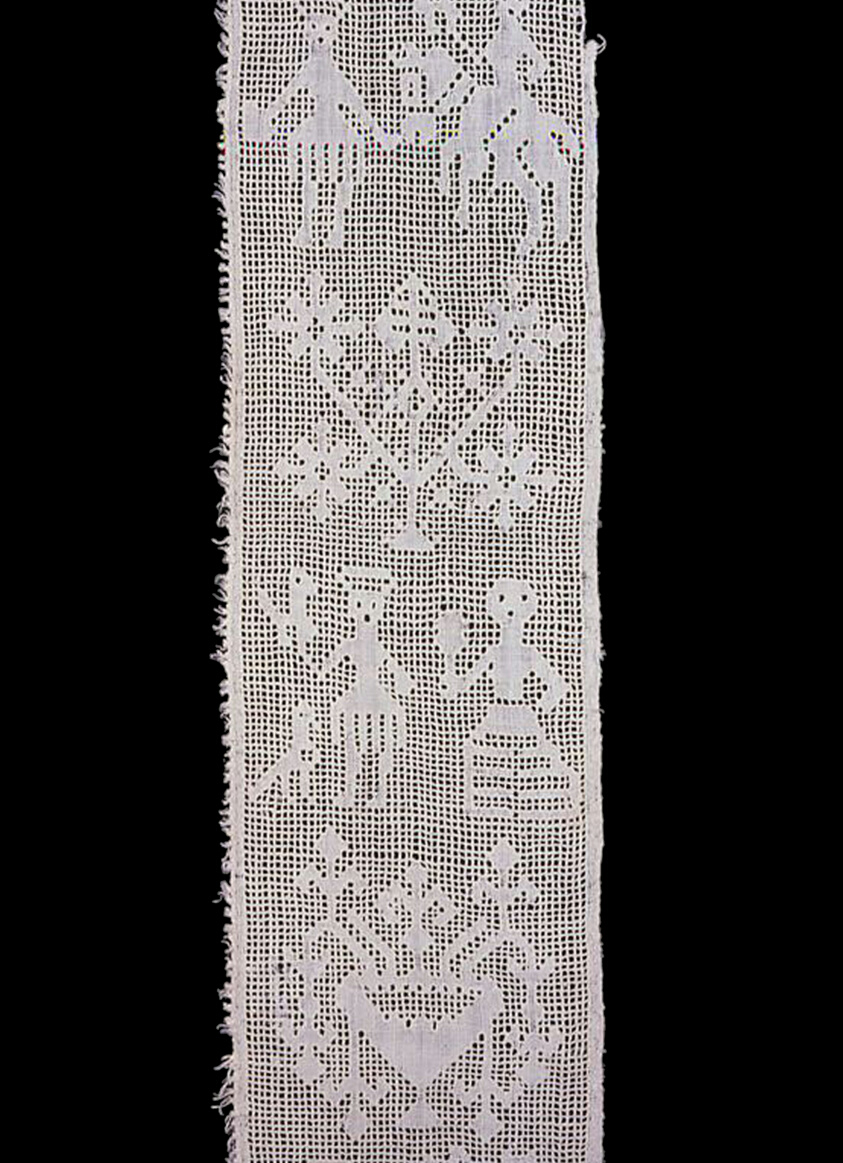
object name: Textile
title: Border (From a Cover)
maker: Italy or Spain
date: Probably 1650/1700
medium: Linen, plain weave; cut and drawn thread work in overcast stitches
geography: Italy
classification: textile; needlework (visual works)